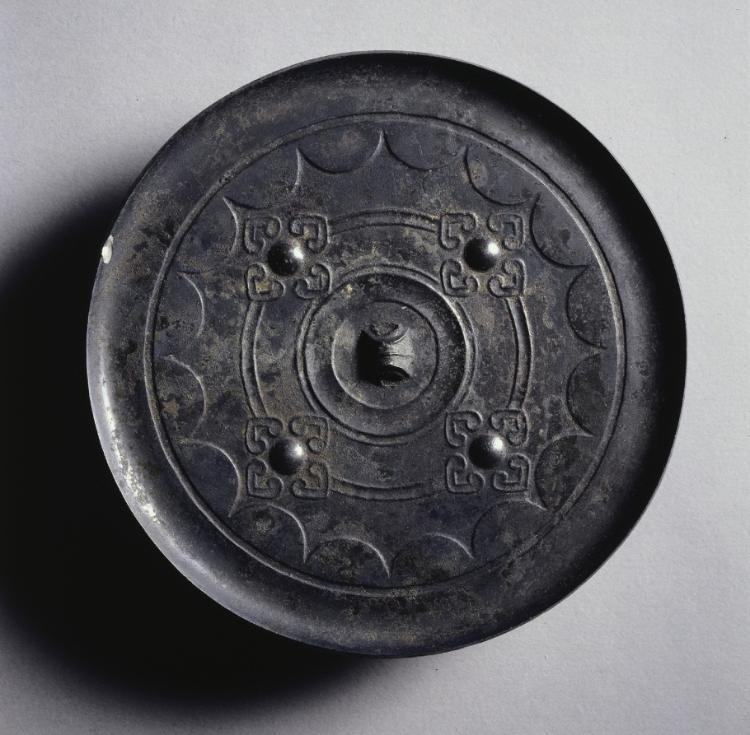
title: Mirror with Quatrefoils and Linked Arcs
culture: China, Western Han dynasty (206 BCE–8 CE)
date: 100s BCE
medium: bronze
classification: Metalwork